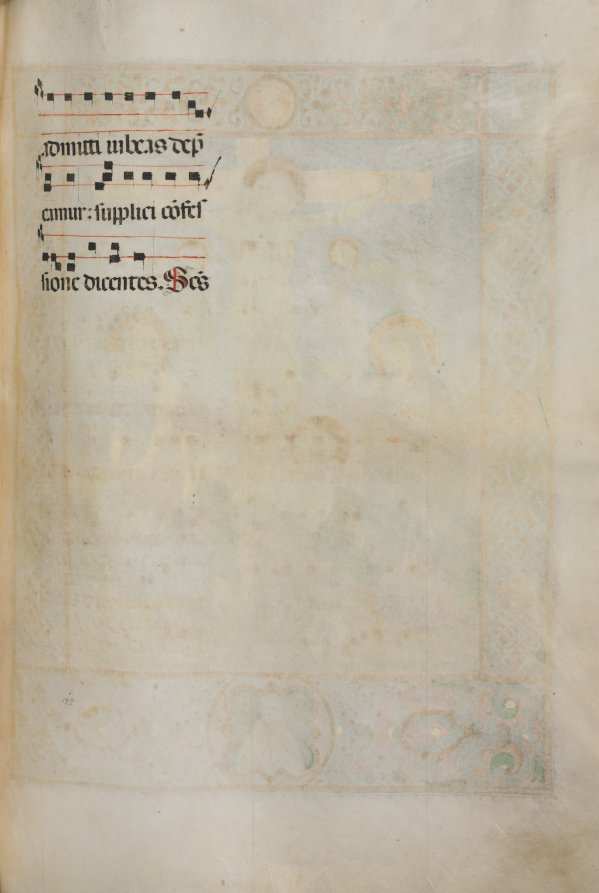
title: Missale: Fol. 185: Cross, Foliage & Music for Various Ordinary Prayers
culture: Italy, Perugia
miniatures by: Bartolommeo Caporali (Italian, c. 1420–1503)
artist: assisted by Giapeco Caporali (Italian, d. 1478)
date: 1469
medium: ink, tempera and burnished gold on vellum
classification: Bound Volume